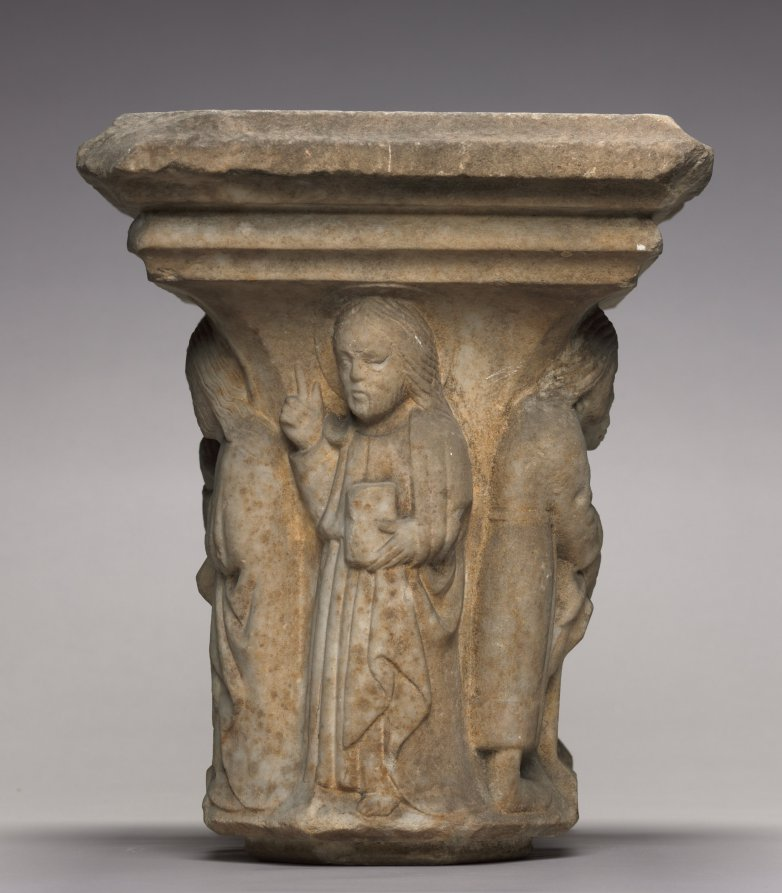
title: Engaged Capital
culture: Southern France, Abbey of Larreule, near Tarbes, 15th century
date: 1400s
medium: limestone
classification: Sculpture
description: This capital belongs to a surviving group including other architectural fragments that once decorated the cloister of the Abbey of Larreule. A cloister was a covered walkway or arcade, usually around all four sides of a square area of grass (the "cloister garth"). The seclusion of the cloister was the monks’ exclusive domain, off limits to others. Here, the monks were supposed to pray, study, meditate, and exercise in privacy and solitude. Such cloister capitals served both to instruct the monks and as a focus for their devotions. Other capitals in this series are installed in the Jardin Massey at Tarbes, near the original abbey. An arch from Larreule has been assembled with other associated French capitals at The Cloisters in New York.